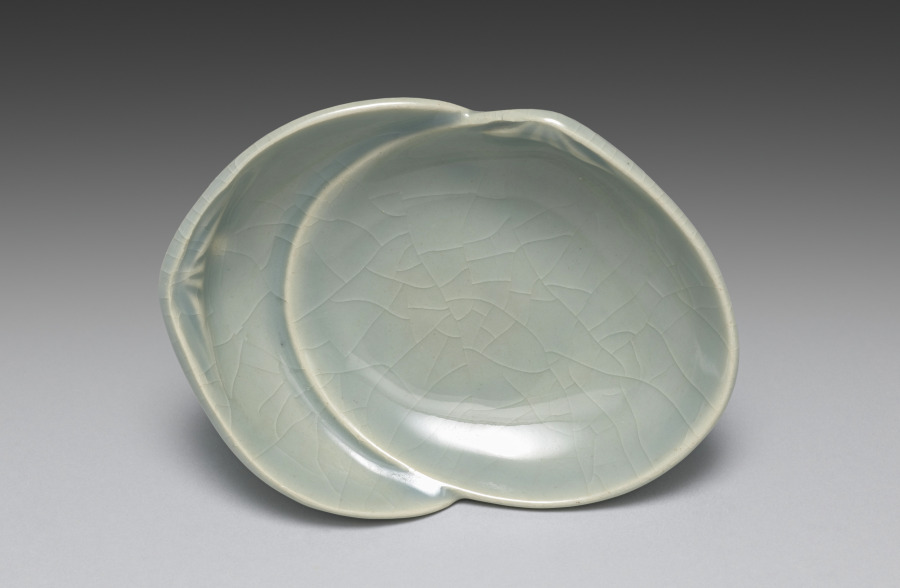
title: Dish from Saucers with Matching Shells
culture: Japan, Meiji period (1868–1912)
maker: Seifū Yohei III (Japanese, 1851–1914)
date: 1893–1914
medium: Porcelain with molded design and green crackled glaze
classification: Ceramic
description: Yohei III’s main output for his sophisticated clientele was in the form of tea sets and dining sets. He created a range of dishes in green glazes. He often produced in pairs, sets of five, or sets of ten. The set of five dishes with a more complex form is described as having a “water-colored glaze” (mizuiroyū). These are shaped like clam half shells, a reference to a game in which shell halves painted with narrative scenes or a variety of motifs must be matched back together by the players. The dishes have molded details to articulate the shell forms, and the crackling across each shell adds another dimension to the surface. Each dish is set on three small feet, formed by a pinched piece of clay and attached to an unglazed area on the underside of the dish. Curiously, while four of the dishes are stamped with the artist’s mark, one has instead a signature carved into the base.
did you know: Each of the paired-shell dishes has its own compartment in a long, flat box.